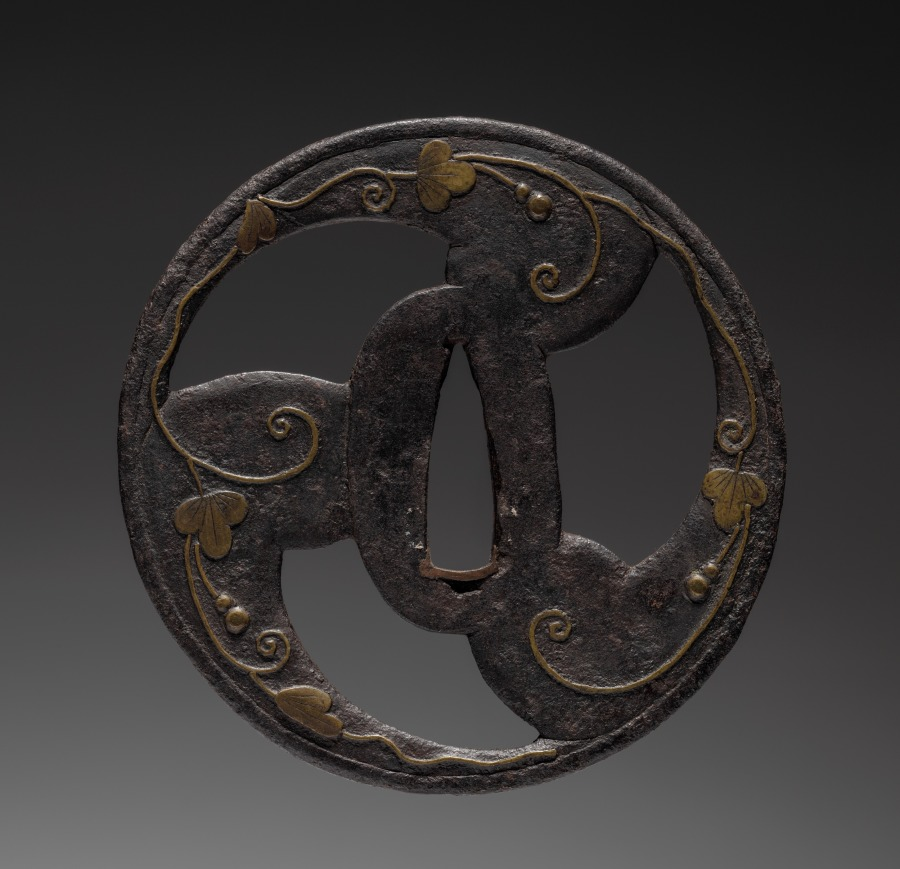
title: Sword Guard (Tsuba)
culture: Japan, possibly Edo period (1615-1868)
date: c. 1615–1868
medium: iron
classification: Arms and Armor